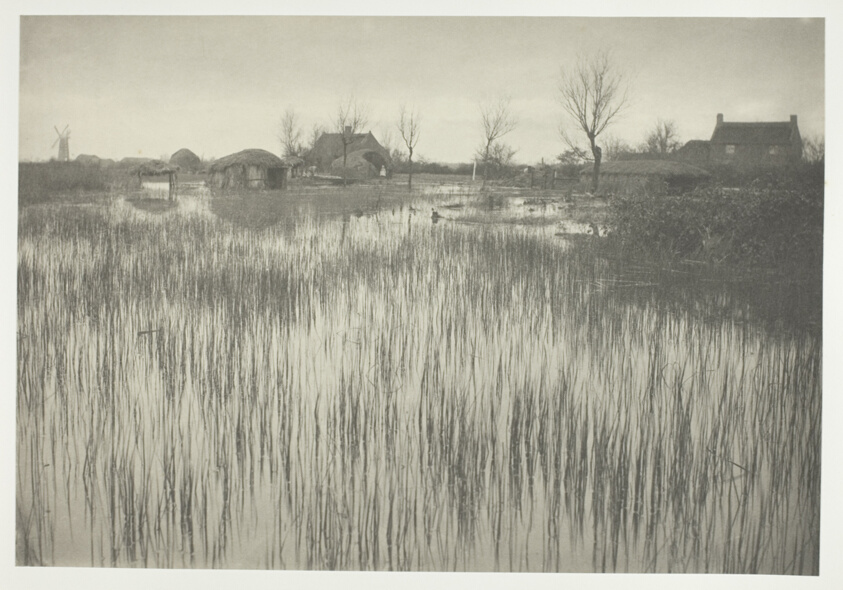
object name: Photograph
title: A Rushy Shore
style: 19th century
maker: Peter Henry Emerson (English, born Cuba, 1856–1936)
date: 1886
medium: Platinum print, pl. XXXV from the album "Life and Landscape on the Norfolk Broads" (1886)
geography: England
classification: platinum print; photographic process; photography; photograph